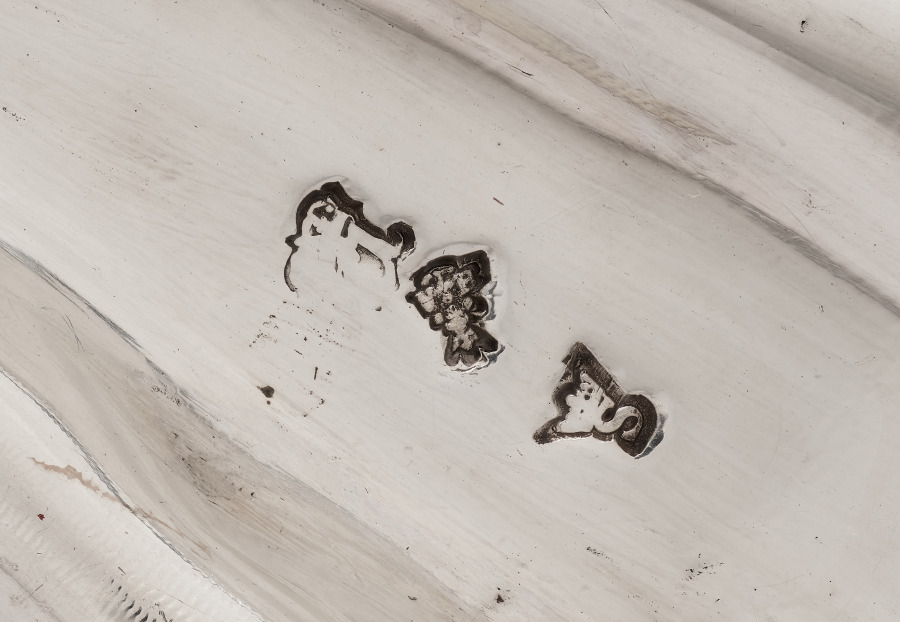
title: Cover for a Tureen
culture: France, Paris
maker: Henry Adnet (French, 1745)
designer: Juste-Aurèle Meissonnier (French, 1695–1750)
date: 1735–38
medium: silver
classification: Silver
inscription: engraved Meissonnier signature.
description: See entry for cover record 1977.182.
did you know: The langoustine, pigeon, and vegetables were cast using real examples giving the silver copies lifelike detail and appearance.